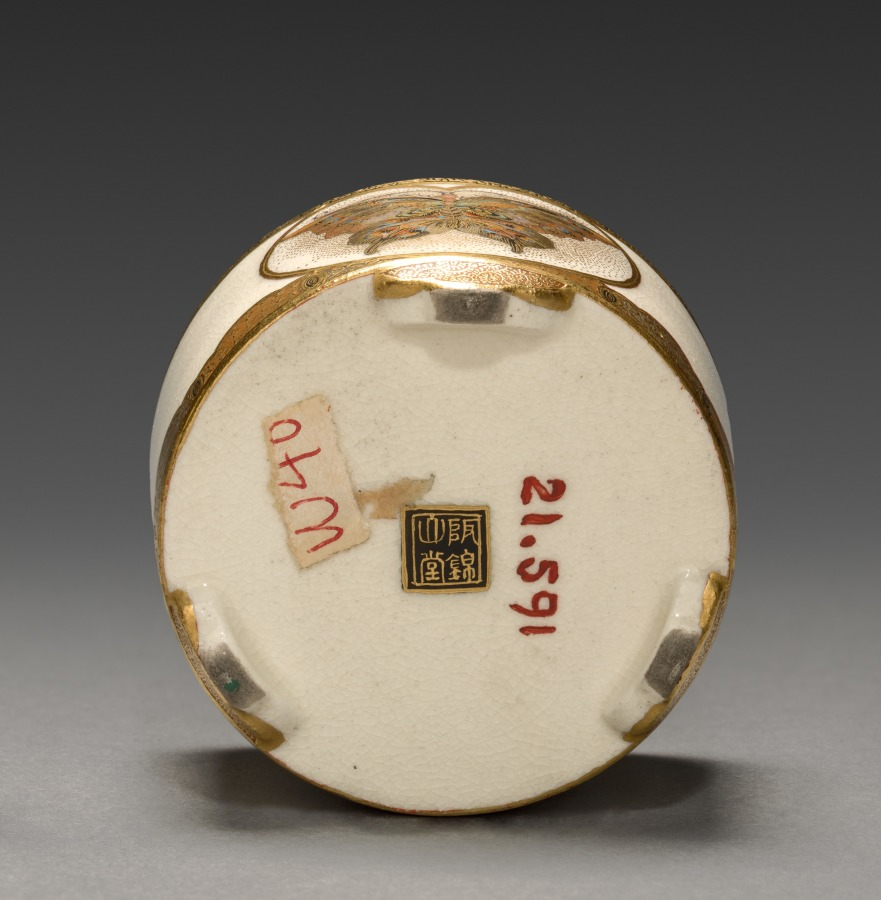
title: Jar with Butterflies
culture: Japan, Meiji period (1868–1912)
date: late 1800s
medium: porcelain (Satsuma ware)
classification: Ceramic